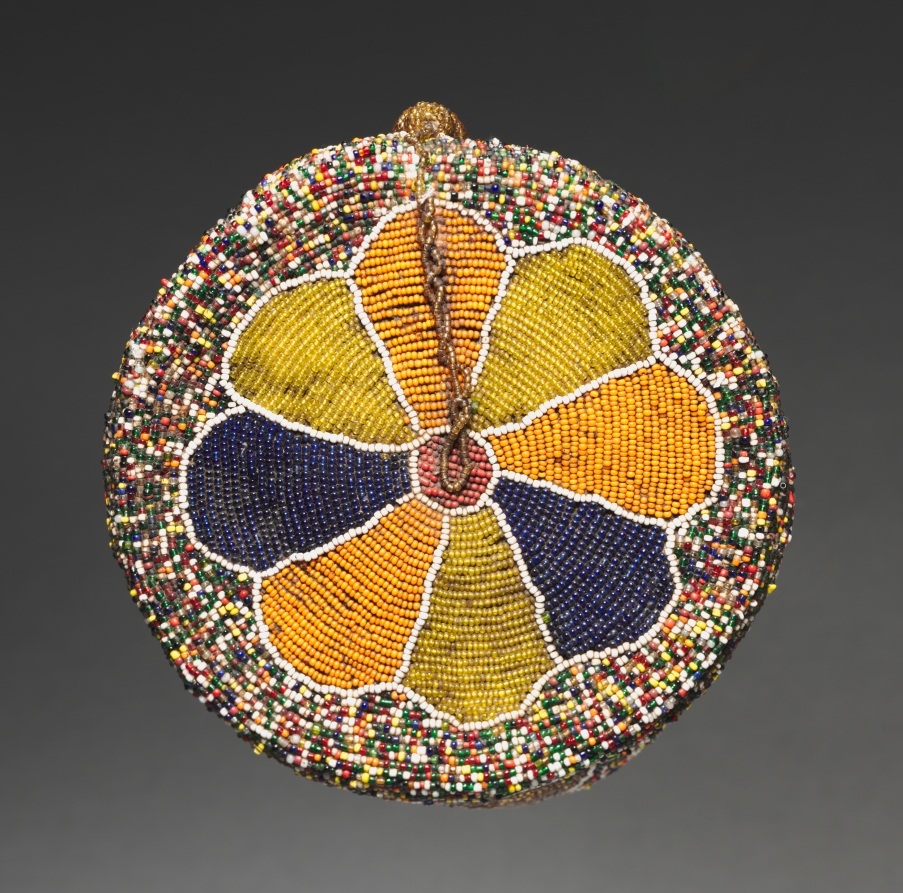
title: Coronet (oríkògbófo)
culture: Africa, West Africa, Nigeria, Yorùbá-style maker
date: 1900s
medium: Cloth, glass beads, and thread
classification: Garment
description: Like the rare conical crown (ade), the coronet (oríkògbófo) may only be worn by a king descended from Oduduwa, the first king of the Yorùbá. While the crown is reserved for special occasions, the coronet may be used by the king for less formal public events and when entertaining non-Yorùbá visitors. It signifies wealth rather than royal status.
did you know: The beads on this sculpture were imported, likely from Venice or Bohemia (now called the Czech Republic).